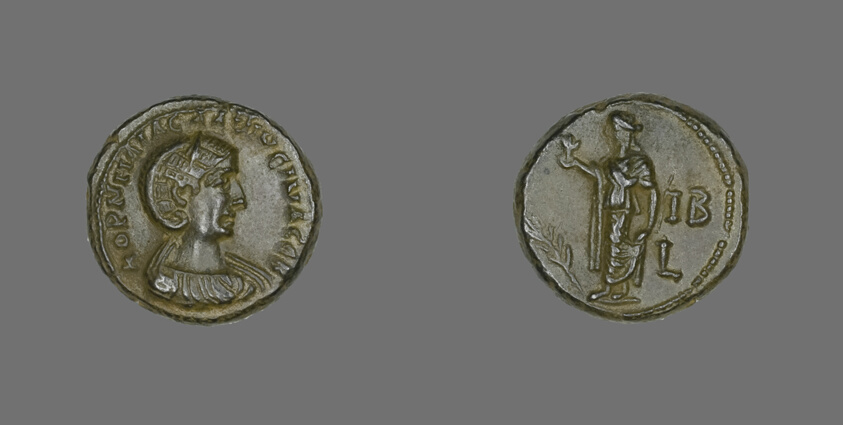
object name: Coin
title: Coin Portraying Empress Salonina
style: roman (ancient, style or period), ancient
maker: Roman, minted in Alexandria, Egypt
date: 264-265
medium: Billon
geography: Roman Empire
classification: coin; ancient art